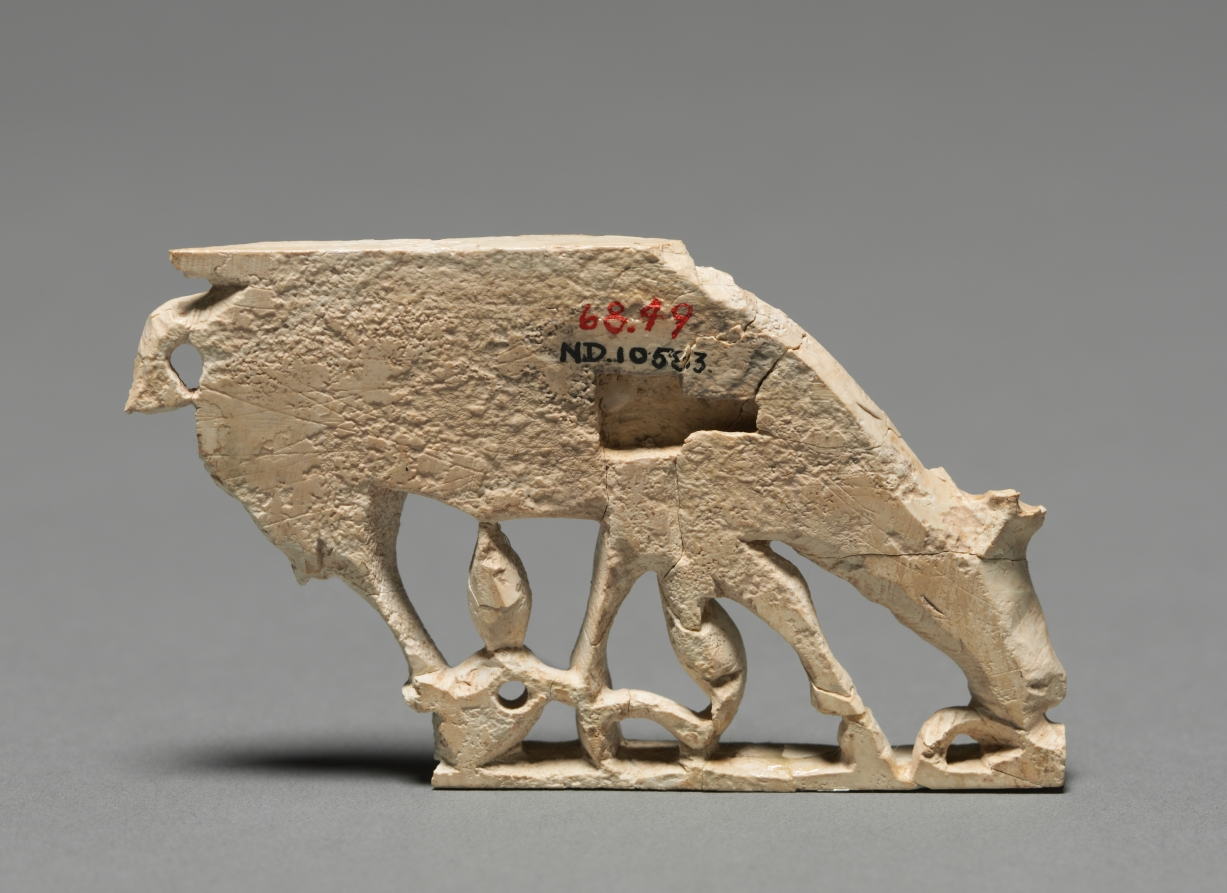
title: Decorative Plaque: Browsing Stag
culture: Phoenicia, Iraq, Nimrud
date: 900–800 BCE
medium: ivory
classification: Ivory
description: This small plaque was executed in the Phoenician style with symmetrical compositions, elongated figural proportions, and Egyptian subjects and motifs. Examples have been found throughout the Middle East, but thousands come from Nimrud where most were excavated in the storerooms of a military arsenal built by King Shalmaneser II (858-824 bc). When the Nimrud palace was sacked in the 7th century bc, these ivories were thrown into a well, where Sir Max Mallowan (the husband of Agatha Christie) discovered them in 1951. The monumental wall relief (1943.246) was found at the same Assyrian palace at Nimrud.